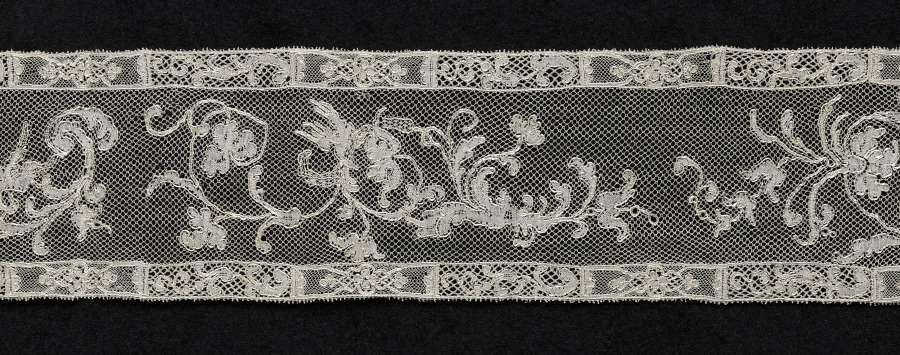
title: Lace Lappet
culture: France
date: 1780s–90s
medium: Silk: bobbin lace (Mechelen blonde lace)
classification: Lace